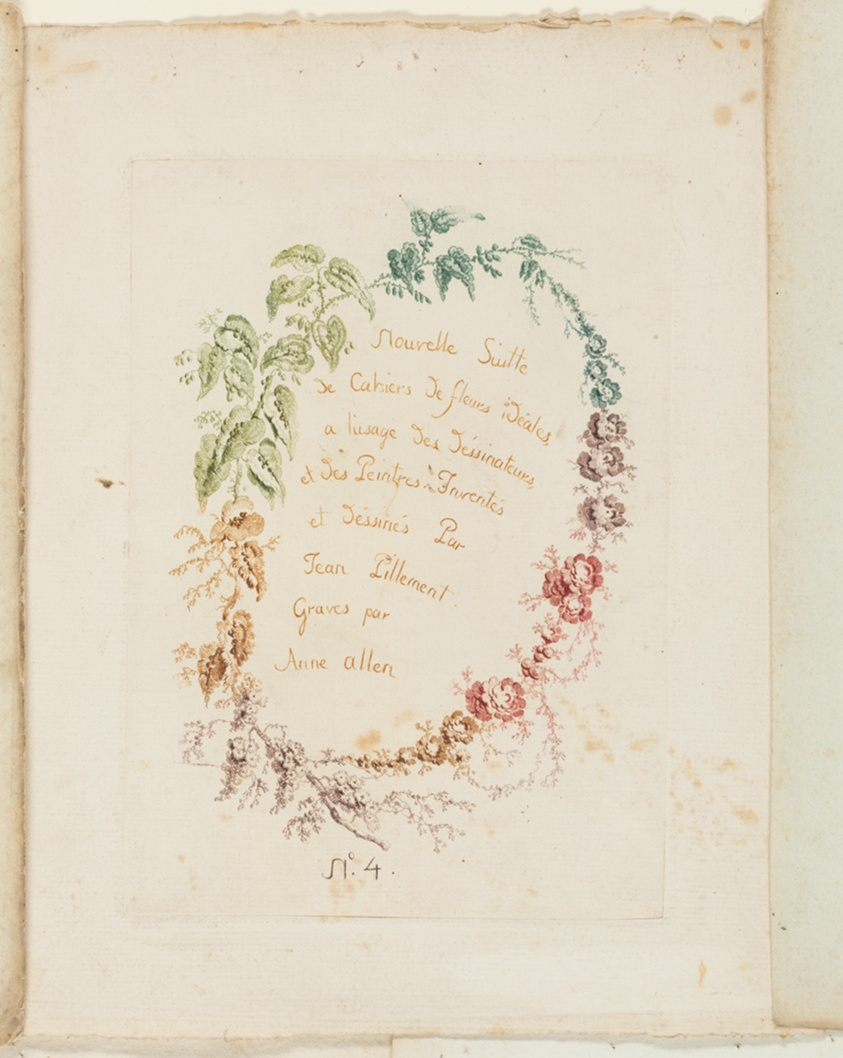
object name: Print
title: Title Page, from New Suite of Notebooks of Ideal Flowers for Use by Draftsmen and Painters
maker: Anne Allen (English, active 1790s); after Jean-Baptiste Pillement (French, 1728-1808)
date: c. 1795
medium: Color etching with à la poupée inking on cream laid paper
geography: England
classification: etching; print; prints and drawing